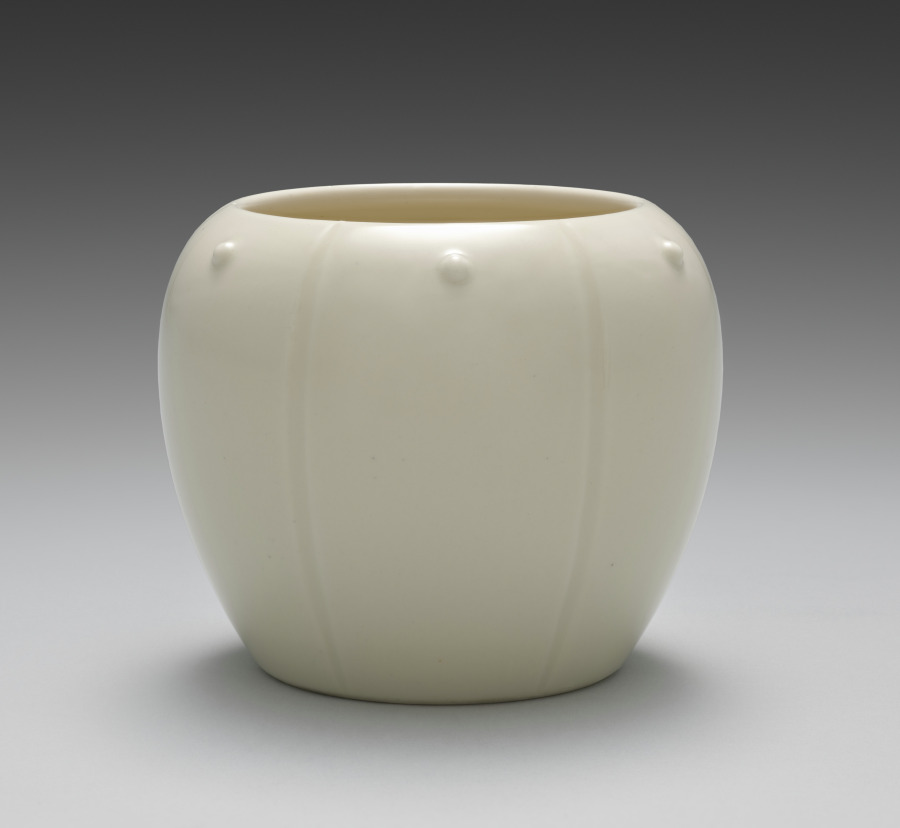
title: Container from Lit Charcoal and Ash Containers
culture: Japan, Meiji period (1868–1912)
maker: Seifū Yohei III (Japanese, 1851–1914)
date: 1893–1914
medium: One from a set of four containers; porcelain with molded design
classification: Ceramic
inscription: 清風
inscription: The storage box for this set is inscribed and impressed with seals.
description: The box lid for these six-lobed lit charcoal and ash containers, or hiire, identifies them as kōhakuji, another of Yohei III’s translucent cream colors over ivory clay bodies. One might translate the name as “lustrous pearl[–glazed ivory] porcelain.” A hiire was filled with ash with burnt coals at the center so that embers and tobacco ash could be discarded safely during a gathering. Each of the lobes on the containers has a round protrusion set below the rim. The studlike pattern is called ruiza. The term is also used to describe the pattern that rings the shoulder of some flower vases or metal kettles used in chanoyu.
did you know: The Seifu studio generally followed the standard practice in Japan for identifying the artist and object in box inscriptions.